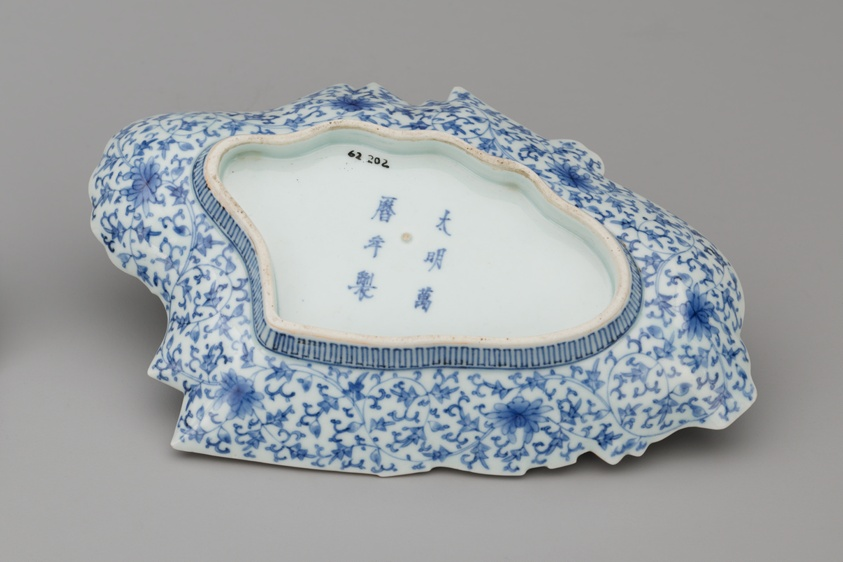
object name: Vessel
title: Dish with Design of a Court Woman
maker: Japan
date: 18th century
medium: Porcelain with colored enamels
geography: Japan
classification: porcelain; asian art; ceramics; decorative arts